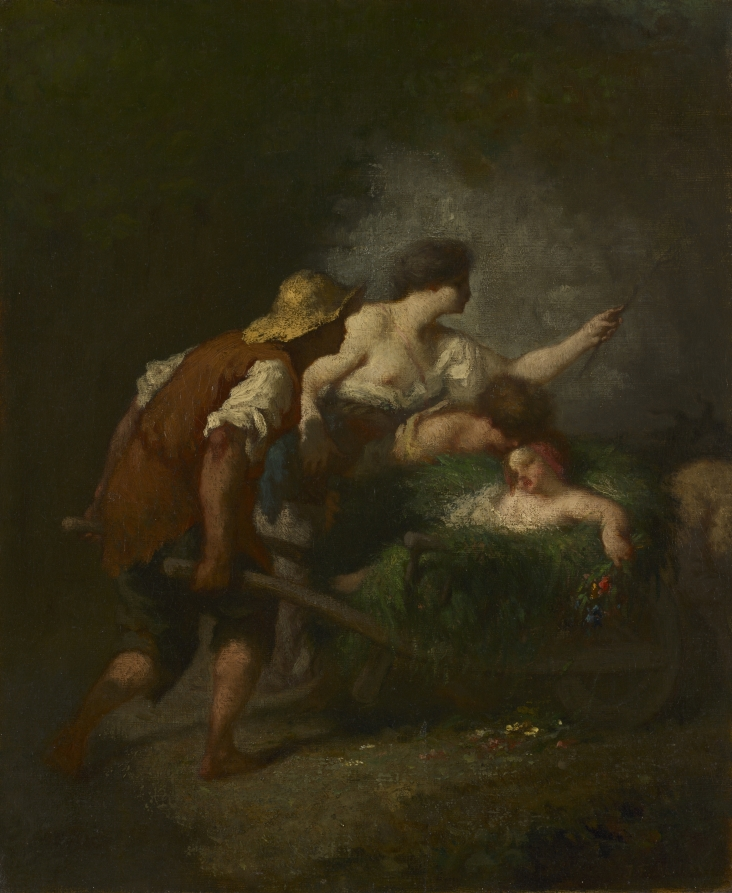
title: Return from the Fields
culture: France, 19th century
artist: Jean-François Millet (French, 1814–1875)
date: c. 1846–47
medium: oil on fabric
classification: Painting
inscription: Signed lower right: J. F. Millet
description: This idealized vision of noble peasant life was painted during a period of intense industrialization in France, accompanied by economic depression and the abandonment of farms. Nostalgic peasant scenes were especially popular in the 1840s, a stark contrast to the disillusionment and tension that would violently surface in the Revolution of 1848. The vague shapes and faces of the family seen here make them symbols of the land, rather than individuals.